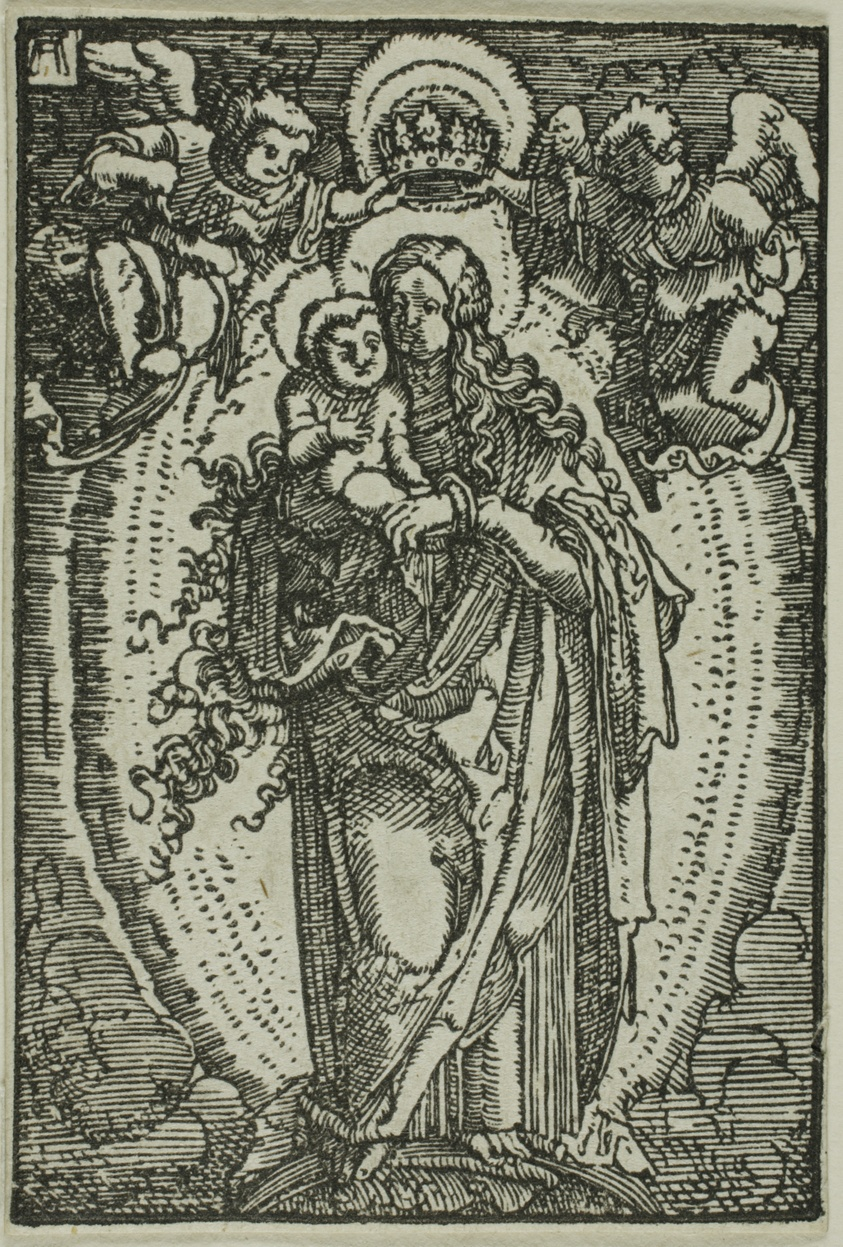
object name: Print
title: The Coronation of the Virgin, from The Fall and Redemption of Man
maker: Albrecht Altdorfer (German, c.1480-1538)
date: 1513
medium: Woodcut in black on ivory laid paper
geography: Germany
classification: woodcut; print; prints and drawing